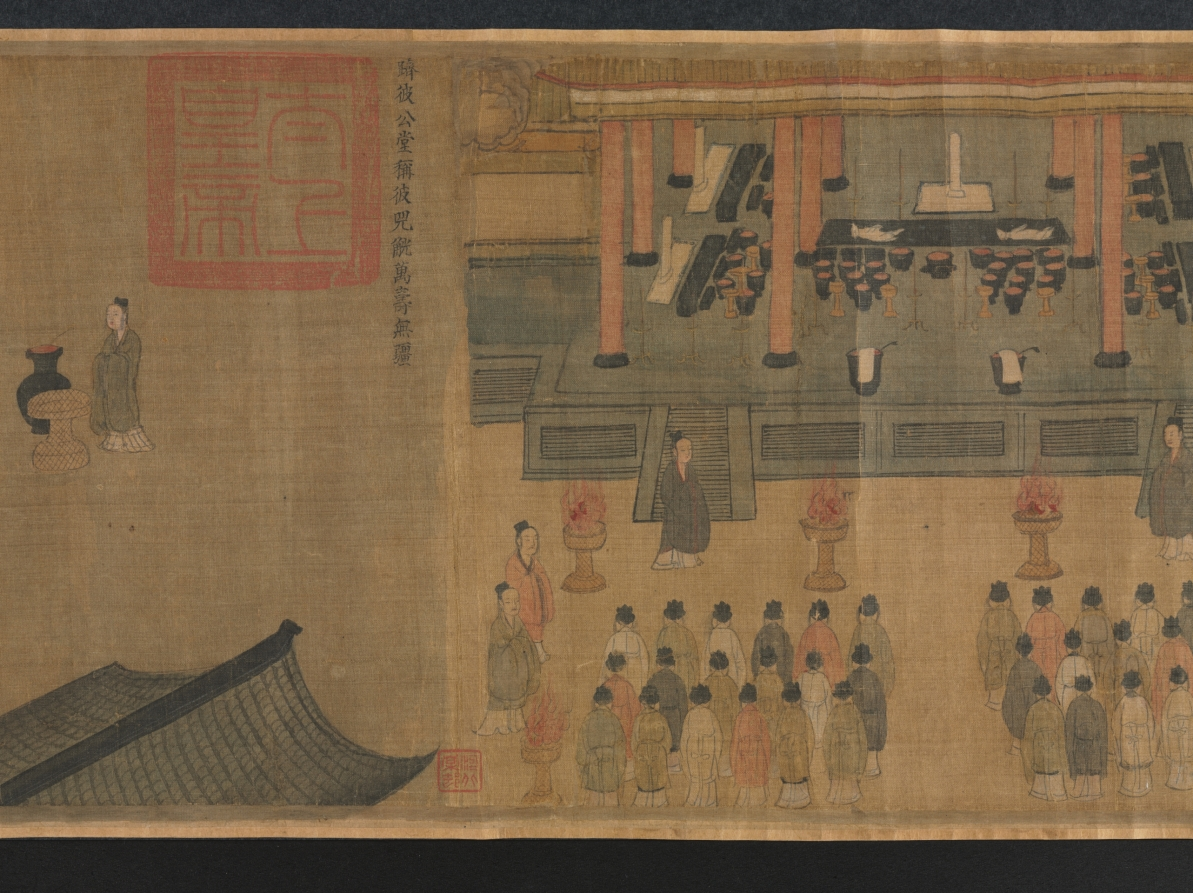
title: "Seventh Month" from the Odes of Bin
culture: China, Southern Song dynasty (1127-1279)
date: 1200s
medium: Handscroll; ink and color on silk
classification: Painting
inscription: Colophons: 1. [on the frontispiece] by the Qianlong emperor (dated 1741). 2. by Lu Wan (dated Zhengde dingchou, 1517). 2. by the Jiaqing emperor (dated 1807).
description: According to Confucian thought, the ruler looks after the well-being of his people which involves agricultural activities. Seventh Month from the ancient Odes of Bin in the Shijing (Book of Poetry) describes occupations throughout the year, including plowing, harvesting, hunting, making clothes, and observing rituals. The earliest illustrations of these Odes accompanied by text were commissioned by Southern Song emperor Gaozong (reigned 1127–1162). As the lower Yangzi delta had become the new seat of government, Gaozong had sets of these illustrations produced by court artists to revive the dynasty and convince the Confucian officialelite of his legitimacy to rule.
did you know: The Odes of Bin appears in the classic Shijing (Book of Poetry), an anthology of more than 300 poems, folk songs, and ceremonial hymns that were originally chanted to music.